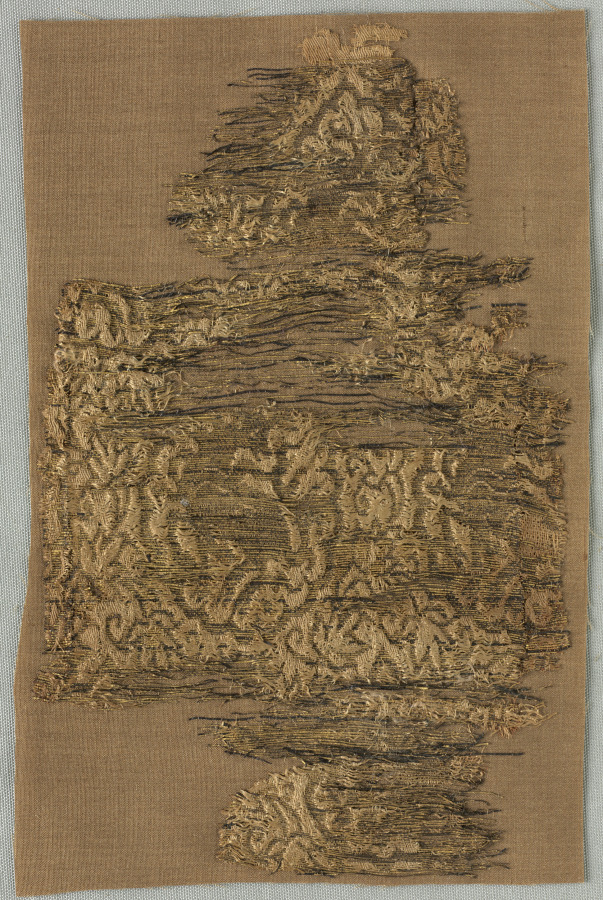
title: Fragment (Xilins in Bulb Palmettes)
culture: Central Asia or Northern China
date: 1200s–1300s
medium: silk and gold thread: lampas weave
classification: Textile